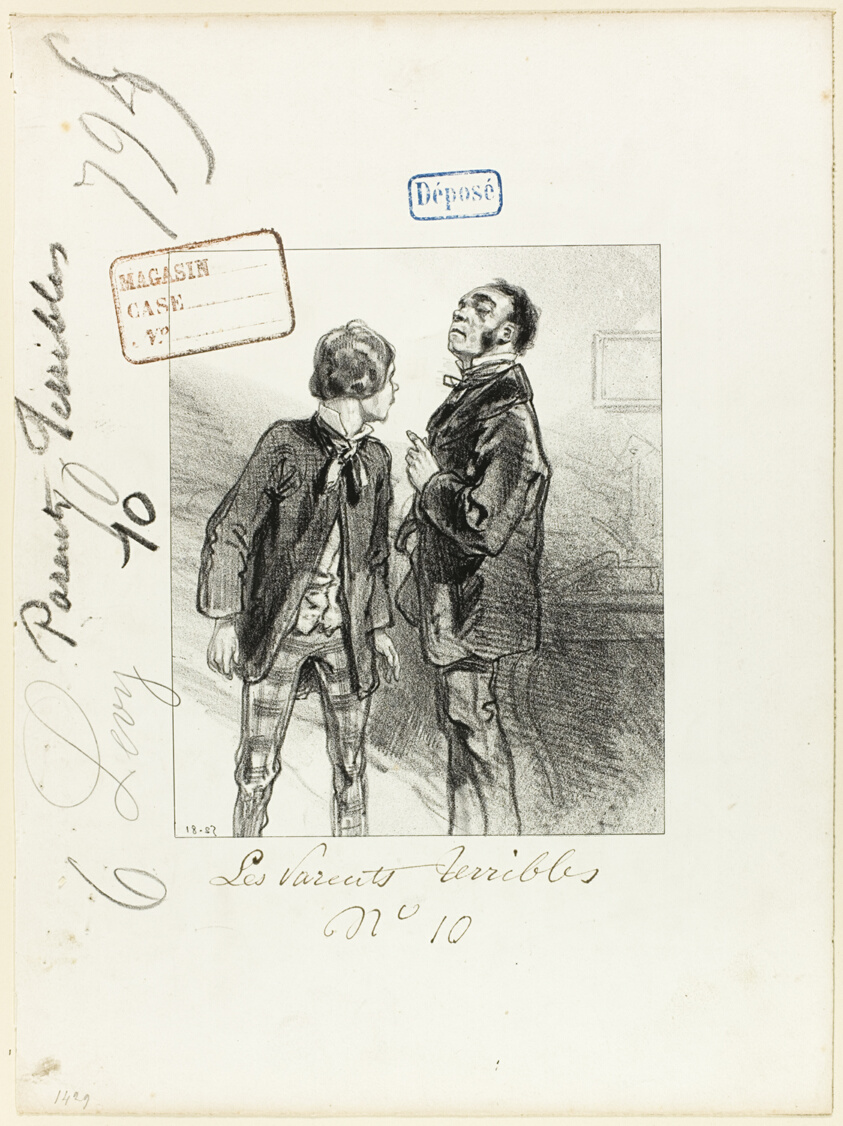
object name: Print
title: Les-Parents-Terribles series: You will conjugate for me 25 times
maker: Paul Gavarni (French, 1804-1866)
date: 1853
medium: Lithograph in black on cream wove paper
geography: France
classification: lithograph; print; prints and drawing